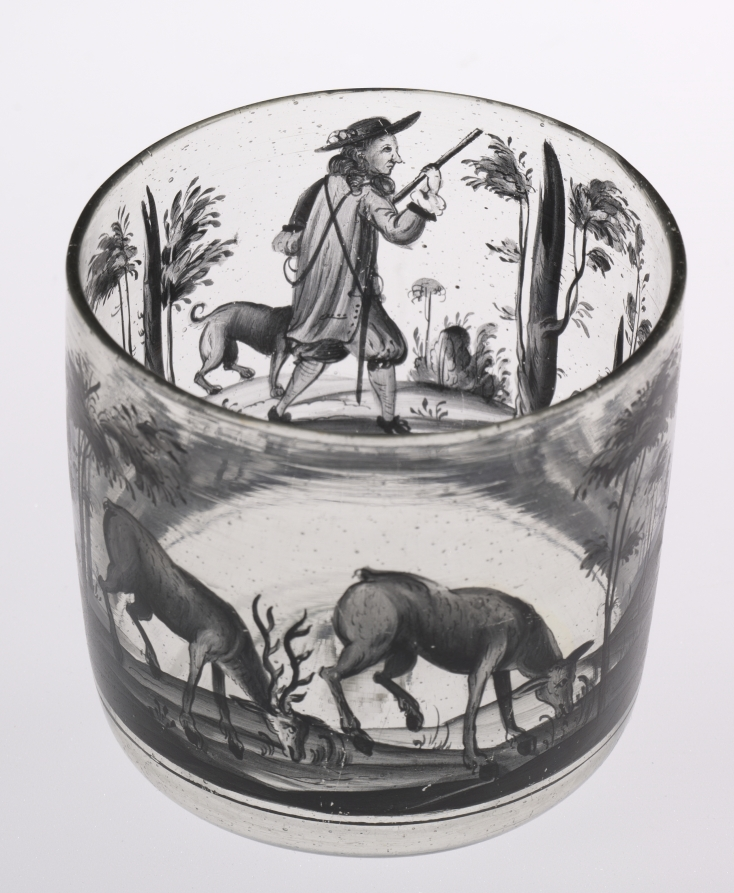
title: Bowl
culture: Germany, mid-17th century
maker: attributed to Johann Schaper (German, 1635–1670)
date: c. 1665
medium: Wheel engraved glass; enamel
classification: Glass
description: Johann Schaper (1621-1670) was a German painter of stained glass, mainly working in Nuremberg and Regensberg, who later turned to decorating glass and ceramics from his home, which was typical of artisans in the 17th century (hausmaler). His style was mainly a linear one in the manner of engravings, and often he worked in black (schwarzlot) or dark colors. Schaper was so influential that other artisans tried to copy his technique, in which he scratched out details with a needle, with varying degrees of success.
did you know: The fine details of the decoration were achieved by scratching away the enamel with a needle.